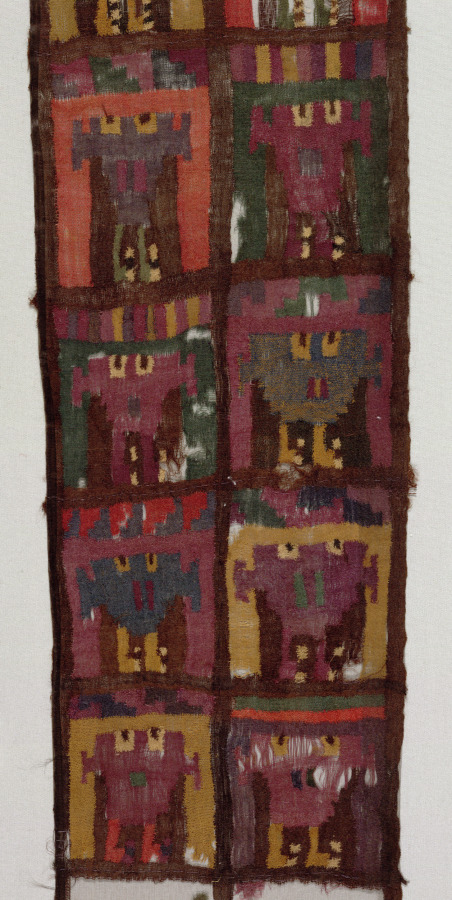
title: Band with Trophy Heads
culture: Peru, South Coast, Nasca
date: 100 BCE–700 CE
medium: interlocking warp and weft, single interlock: wool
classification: Textile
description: This band, remarkable for its intense color and spider-web sheerness, was created using an unusual technique known as discontinuous warp and weft. That is, none of the vertical or horizontal yarns are continuous from one side of the band to the other. Rather, they travel back and forth within their own color areas, linking at the edges with yarns in adjacent areas. This is a difficult feat when weaving on a loom and the creator likely used another approach, such as darning with a needle over a ground cloth that was then removed. The image repeated in each of the band’s rectangles is a head supported on two little feet.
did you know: This band is made in with a weaving technique that is unique to the ancient Andes.